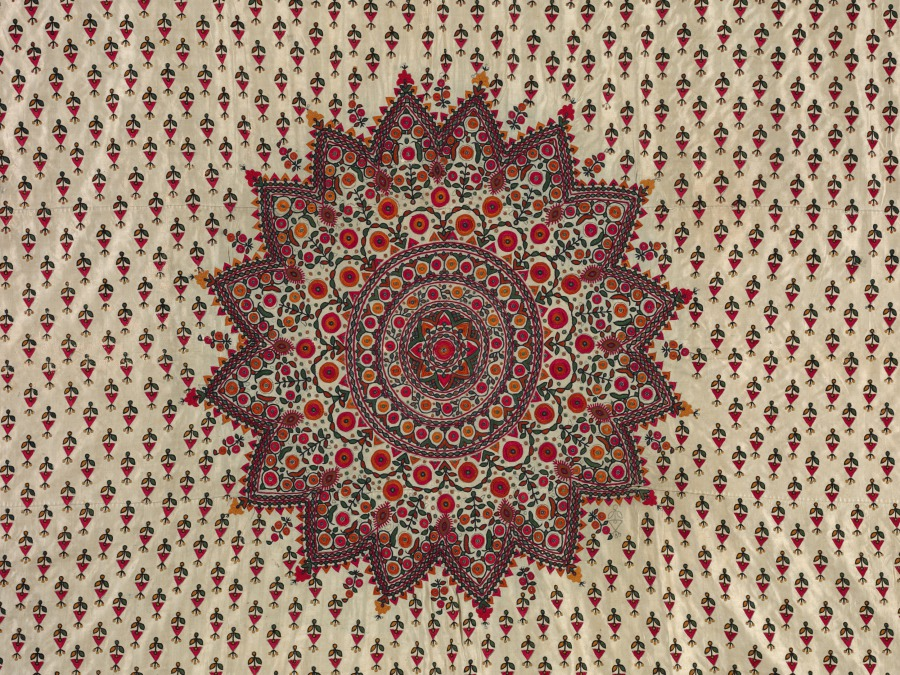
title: Shawl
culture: Western India, Gujarat, Kachchh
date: 1800s–early 1900s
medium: silk thread on silk ground, embroidery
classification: Embroidery